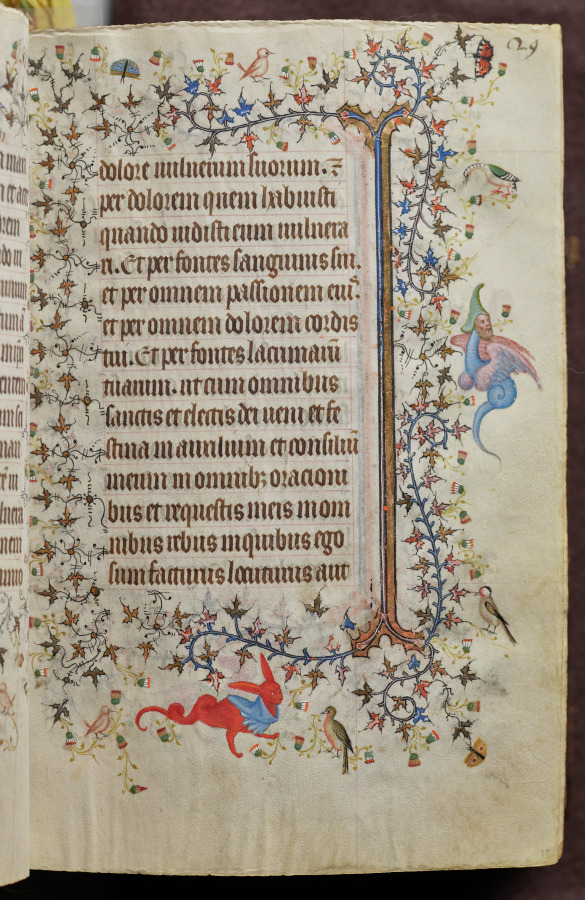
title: Hours of Charles the Noble, King of Navarre (1361-1425): fol. 15r, Text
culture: France, Paris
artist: Master of the Brussels Initials and Associates (French)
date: c. 1405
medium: ink, tempera, and gold on vellum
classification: Bound Volume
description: This precious volume was obviously highly prized by its owner, the French-born King of Navarre, who had his coat of arms painted on no less than twenty folios. Rather than directly commissioning this manuscript from a specific workshop, it seems that Charles the Noble acquired his book of hours -- perhaps ready-made for the luxury market -- while on a trip to Paris in 1404-05. A collaborative effort, six painting styles are evidenced within the pages of this codex, those of two Italians, two Frenchmen, and two Netherlanders. The painter who was responsible for the planning and decoration of the book, and who produced seventeen of the large miniatures, was a Bolognese artist known as the Master of the Brussels Initials. His principal assistant, responsible for most of the borders, was a Florentine who signed his name "Zecho" da Firenze on folio 208 verso.